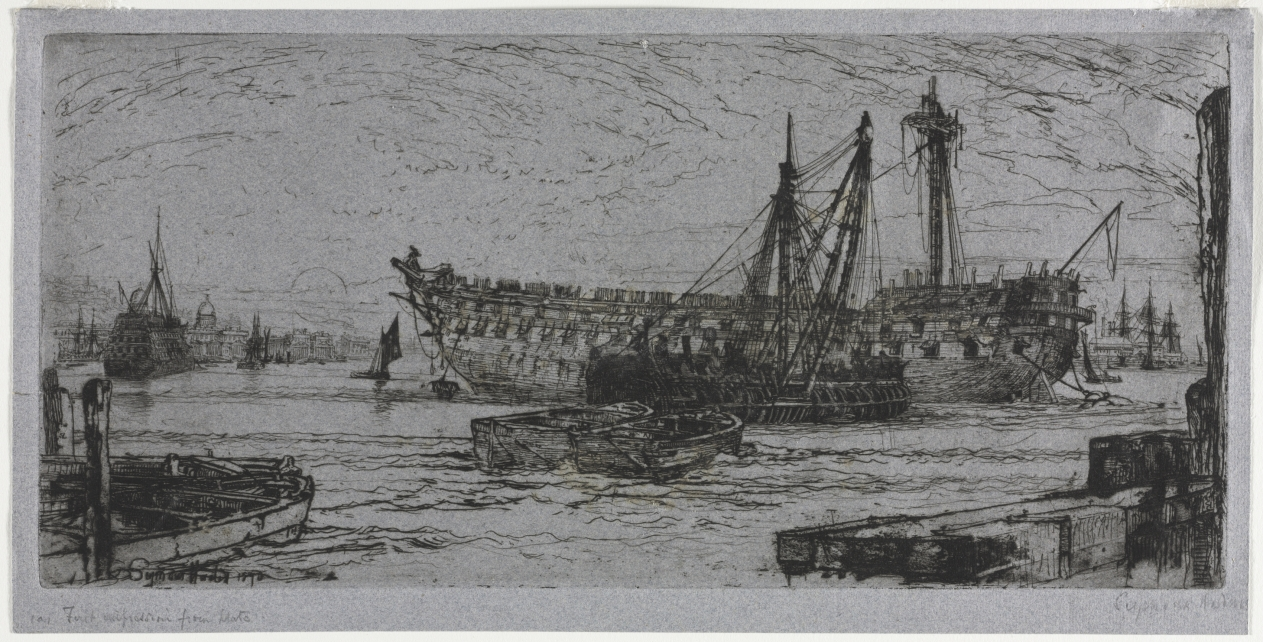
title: Breaking Up of the Agamemnon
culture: England, 19th century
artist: Francis Seymour Haden (British, 1818–1910)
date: 1870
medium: etching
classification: Print